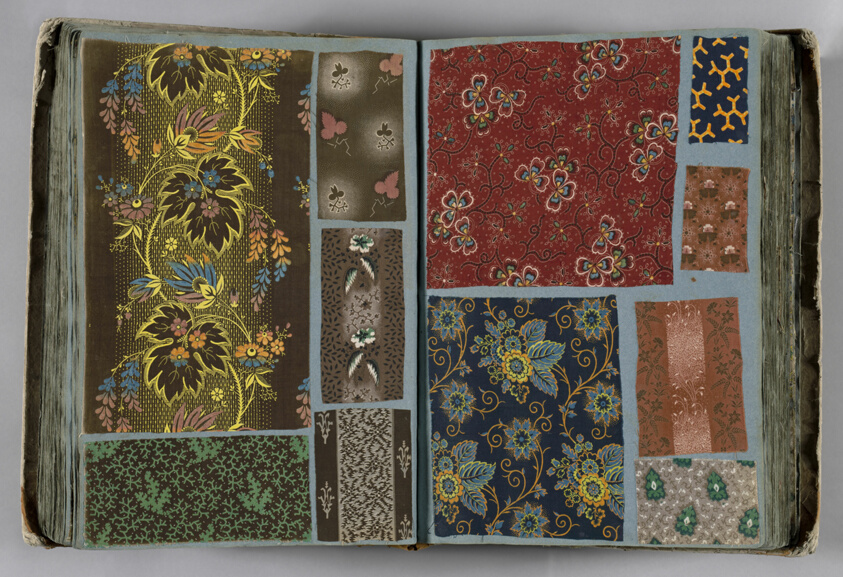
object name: Book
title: Sample book of swatches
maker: Mulhouse, France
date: 19th c.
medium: Sample book of swatches: cotton, plain weave, block printed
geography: France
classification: book; printed; weaving - printed